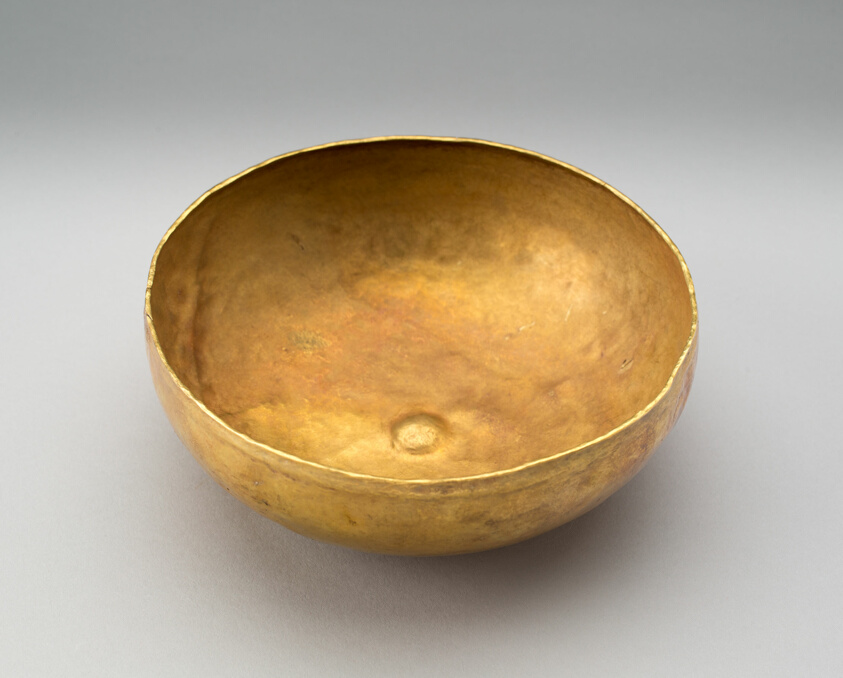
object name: Vessel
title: Miniature Bowl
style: ica, late intermediate period, Pre-Columbian, americas, Arts of the Americas, andean, andes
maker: Inca (South coast, Peru)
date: 1200–1450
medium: Gold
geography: Peruvian South Coast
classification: bowl; metal; art of the americas; vessel